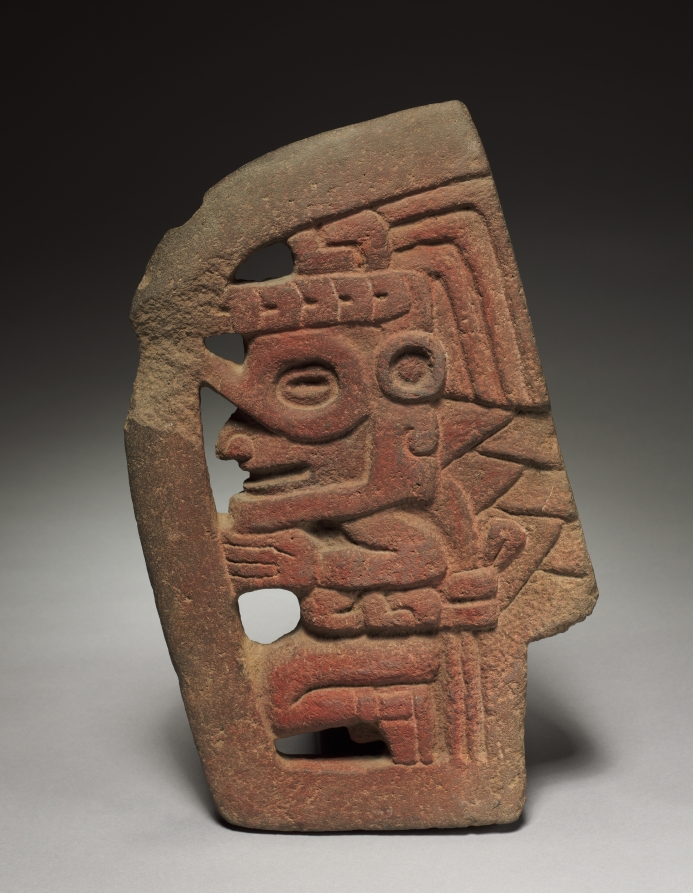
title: Hacha with Openwork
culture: Mexico, Veracruz, El Tajín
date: 600–1000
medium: gray volcanic stone with red pigment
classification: Sculpture